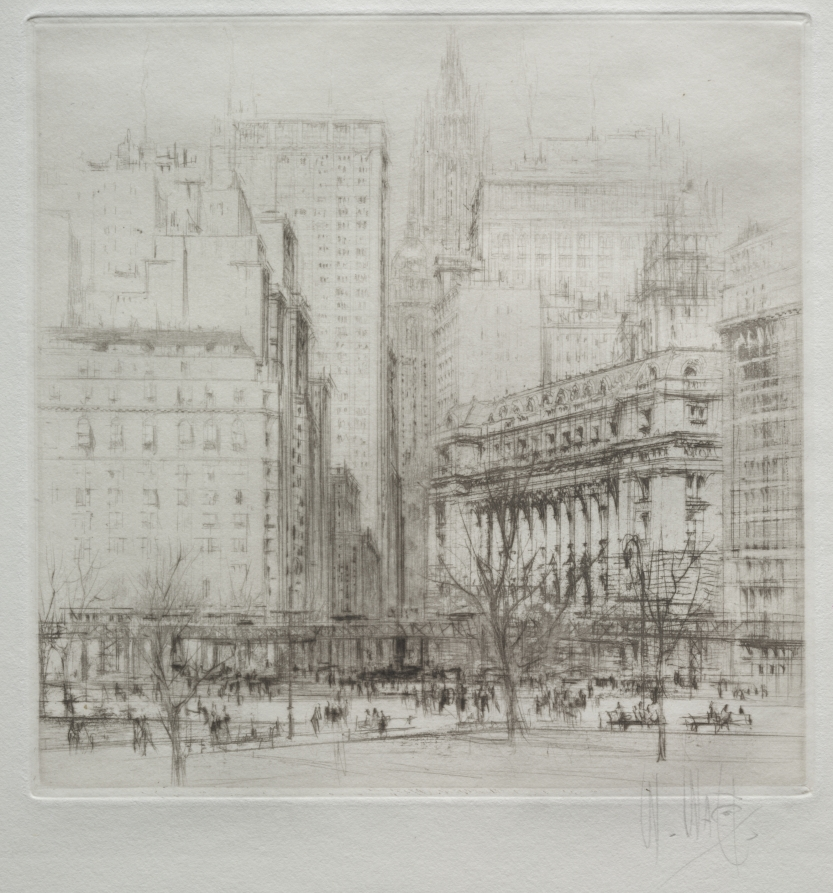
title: New York City: Battery Place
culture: England, 20th century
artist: William Walcot (British, 1874–1943)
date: 1923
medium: drypoint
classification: Print